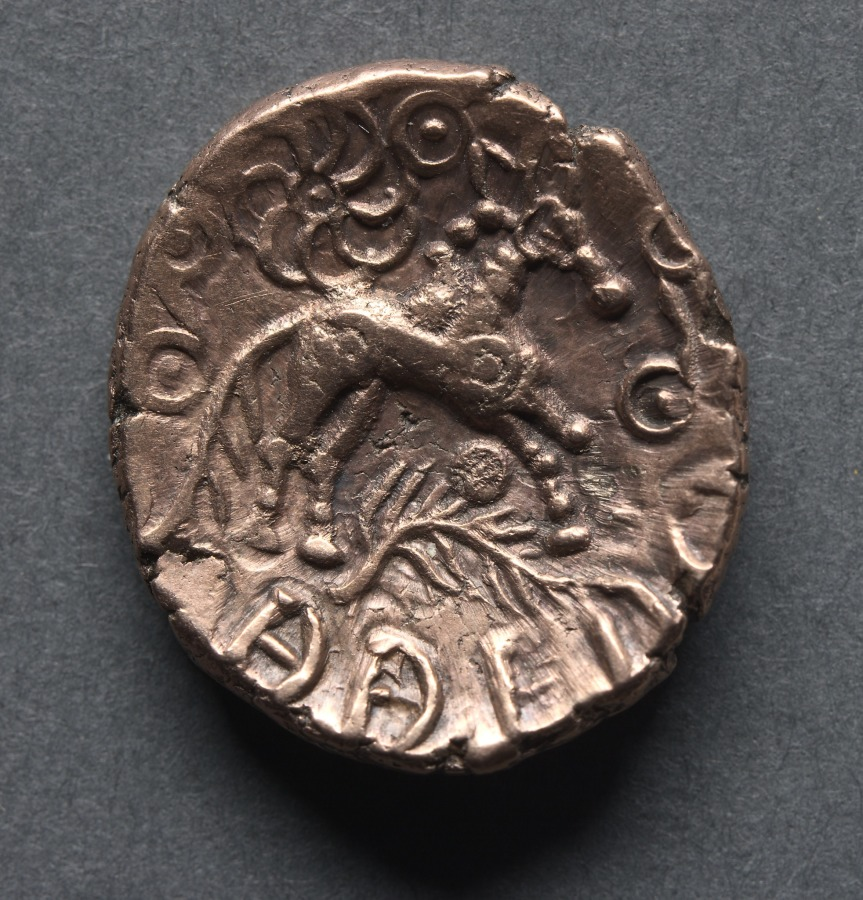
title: Addedomaros Stater: Crescents (obverse); Horse, Branch, and Spiral Sun (reverse)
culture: England, Catuvellauni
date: 50 BCE–10 CE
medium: gold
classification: Coins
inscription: AD[D]ED O[MAROS]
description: Addedomaros was a king of the tribe of Trinovantes, whose territory comprised parts of Essex and Suffolk, with its capital at Camulodunum, now known as Colchester. As a ruler, Addedomaros is completely unknown to history and thus only exists through his coins. Julius Caesar mentions that the Trinovantes were enemies of the Catuvellauni, their tribal areas being adjacent. He also comments that they supplied him with provisions during his second landing in Britain in 54 BC, thirty-nine years before the time of Addedomaros.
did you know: Addedomarus was a king of southeastern Britain and his name is known only from his inscribed coins.